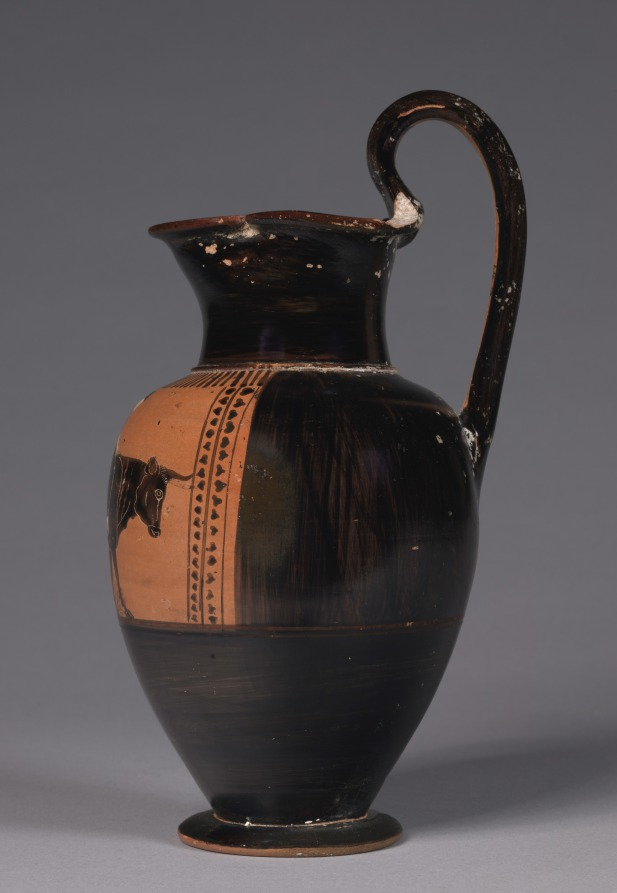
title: Black-Figure Trefoil Oinochoe (Wine Jug): Europa on Bull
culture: Greek, Attic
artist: attributed to Class of Vatican 440 (Greek, Attic)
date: c. 530 BCE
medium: ceramic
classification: Ceramic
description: Calmly seated sidesaddle on a bull, the woman depicted on the front of this small wine jug probably represents Europa, the Phoenician princess abducted by the Greek god Zeus. According to myth, Zeus either sent a bull or transformed himself into one, then carried Europa across the sea to Crete. There, she bore Zeus two or three sons, including the legendary king Minos. The bull ascended to the sky as the constellation Taurus.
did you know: The continent of Europe takes its name from Europa, a Phoenician princess abducted by Zeus.